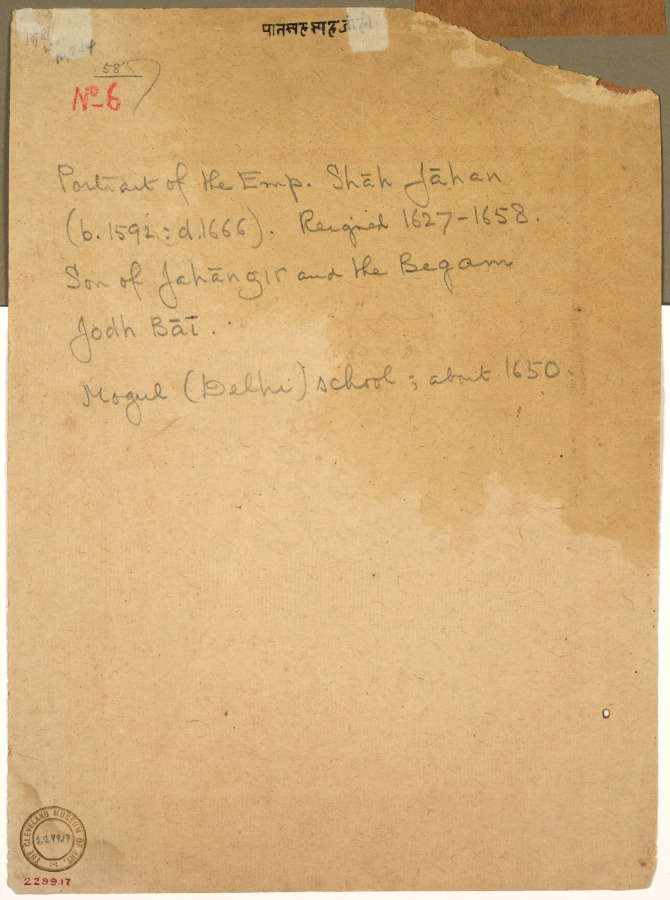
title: Emperor Shah Jahan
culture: India, Mughal Dynasty (1526-1756)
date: late 1600s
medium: Gum tempera and ink on paper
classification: Painting